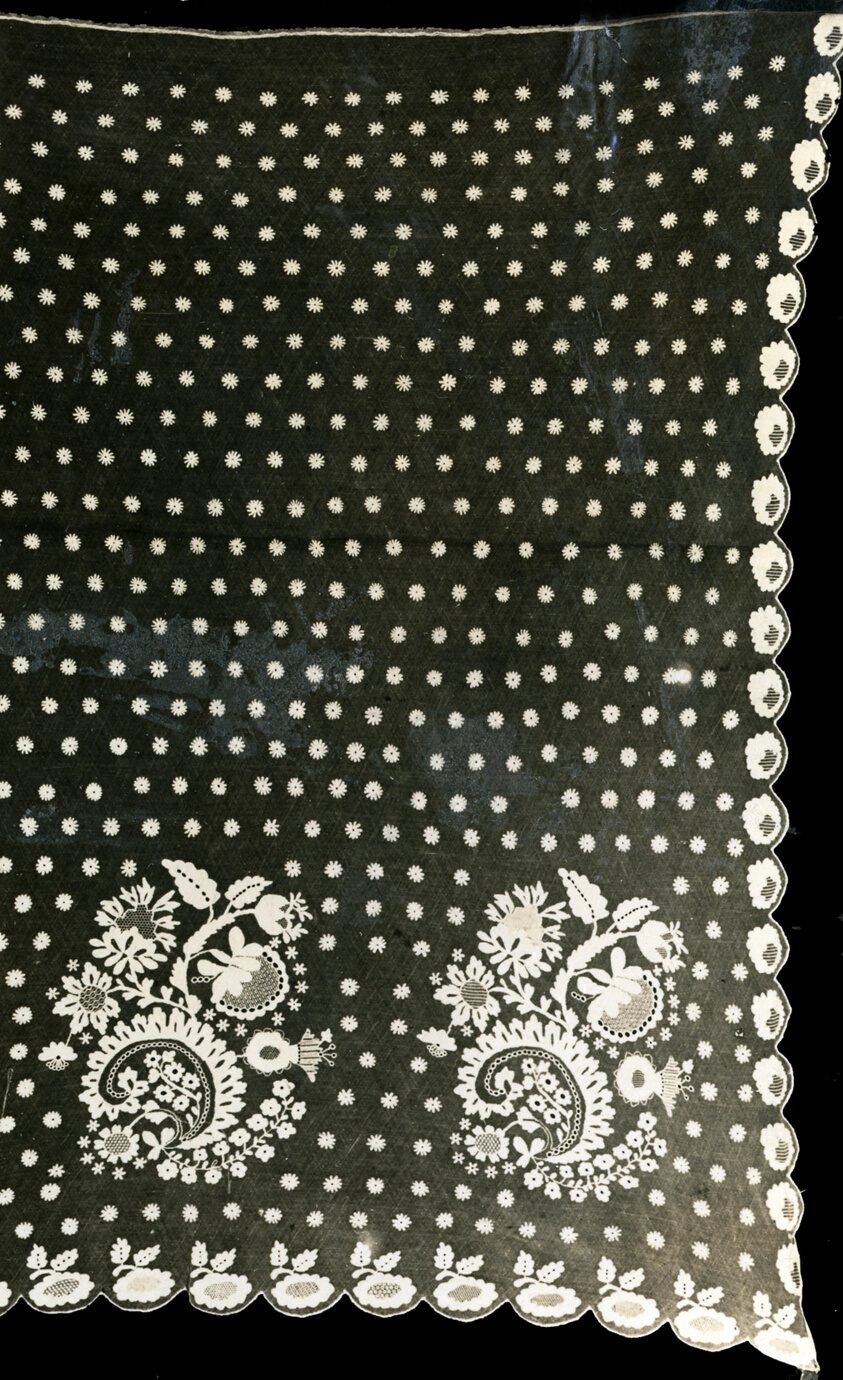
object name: Textile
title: Bonnet Veil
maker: Sara Russ (American, active c. 1837); United States, New Hampshire, Newport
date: 1837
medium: Cotton, machine-made net; embroidered with linen in cross, half cross, darning, overcast, and wave filling stitches; edged with cotton, machine-made picots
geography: Rhode Island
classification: textile; lace - mixed